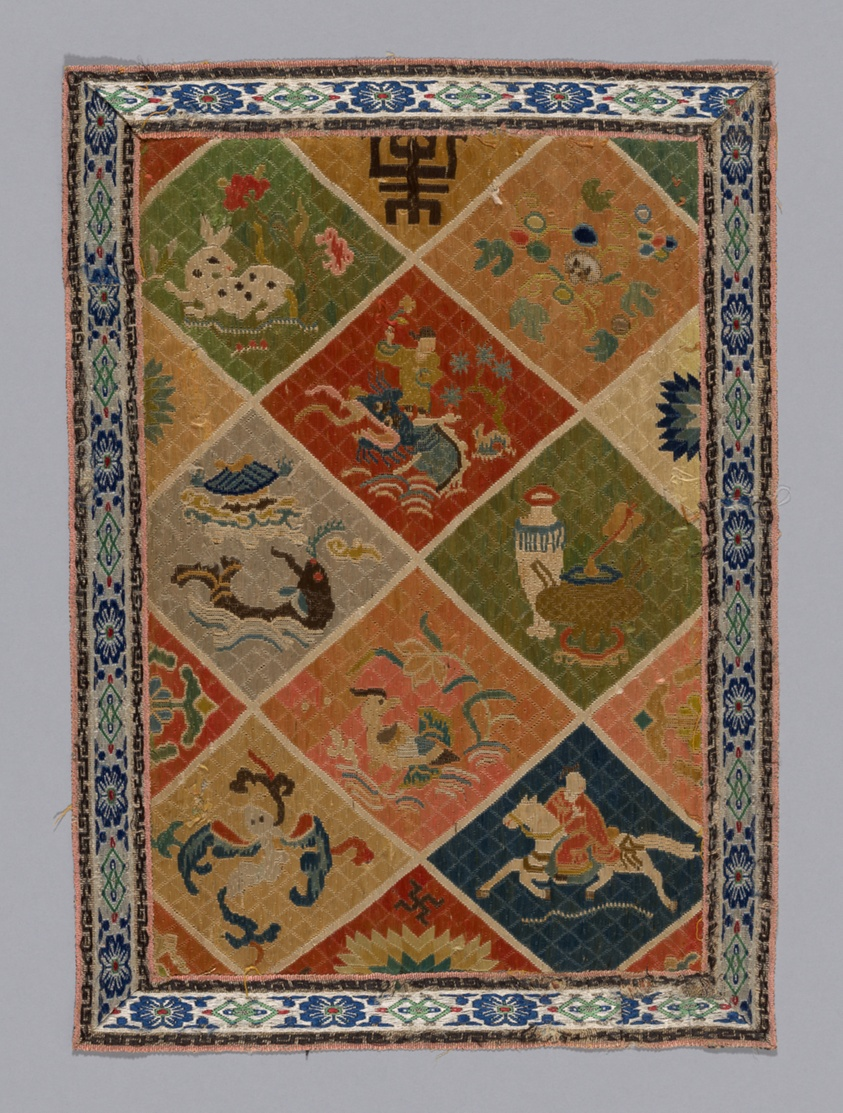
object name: Textile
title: Panel (Dress Fabric)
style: qing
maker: Han-Chinese (China)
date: Qing dynasty (1644–1911), 1875/1900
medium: Geometric patterns with figures and precious things embroidered on gauze.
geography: China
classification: textile; weaving